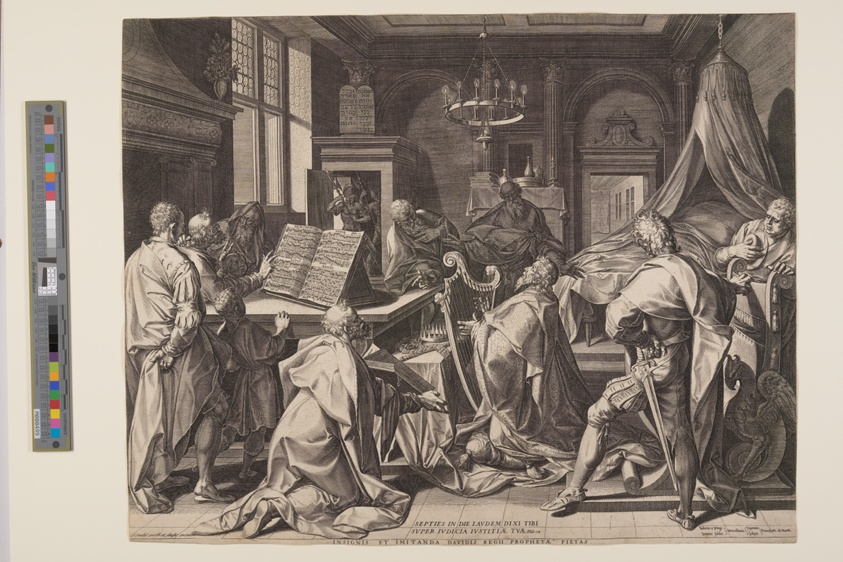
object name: Print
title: David Playing the Harp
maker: Jan Sadeler I (Flemish, 1550–1600); after Joos van Winghe (Flemish, 1544-1603)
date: c. 1585-1600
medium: Engraving on ivory laid paper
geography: Flanders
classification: engraving; paper; print; prints and drawing